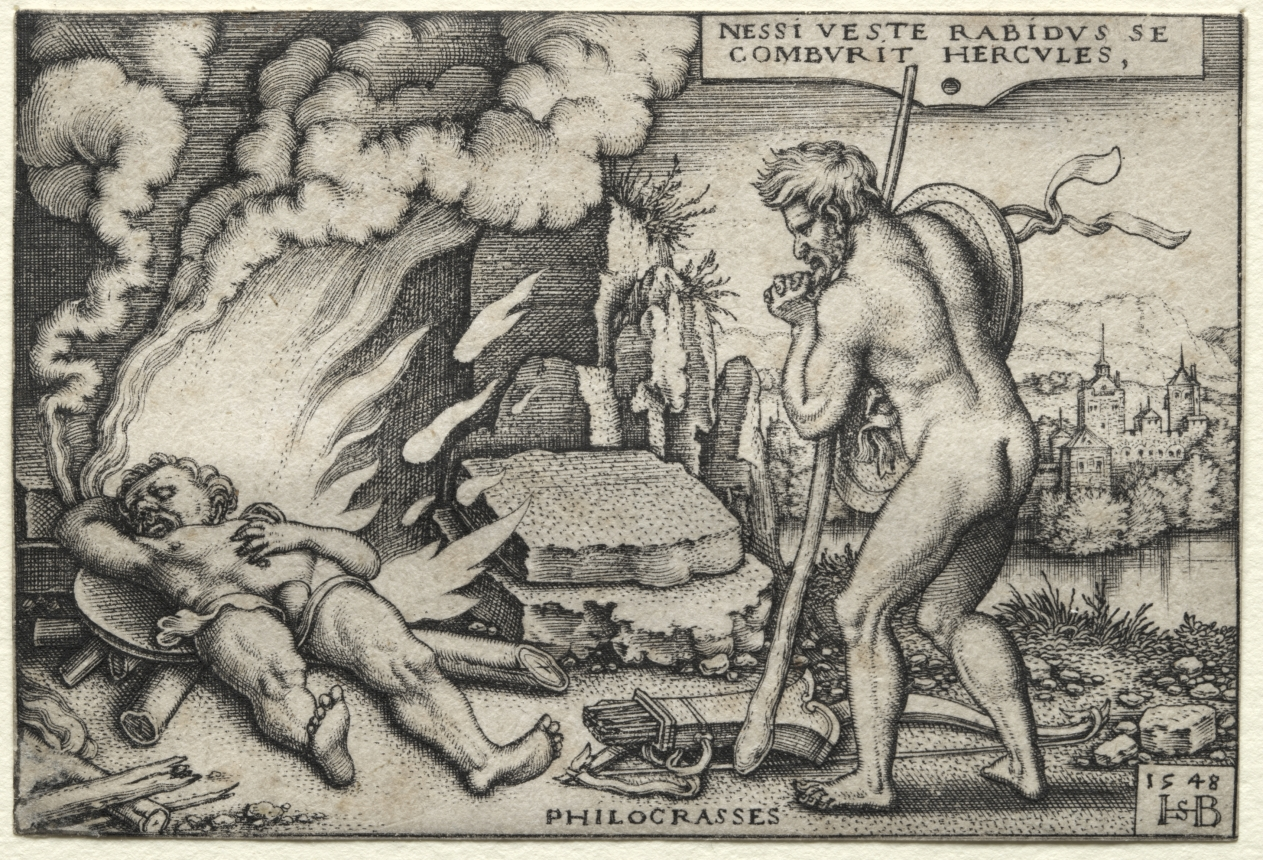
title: The Labors of Hercules: Hercules on his Pyre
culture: Germany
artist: Hans Sebald Beham (German, 1500–1550)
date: 1548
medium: engraving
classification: Print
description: Beham was one of several German printmakers referred to today as the “Little Masters.” They established their artistic prowess by engraving remarkably small prints, appealing to collectors fascinated with miniature objects and curiosities. Here, Beham has packed 12 larger-than-life stories of the mighty Hercules into tiny prints. The series includes three of the 12 labors Hercules performed as penance for slaying his children in a fit of madness: Strangling the Nemean Lion, Killing the Lernean Hydra, and Dragging Cerberus from the Underworld. The other scenes depict tales from his life and the events preceding his death. The son of Jupiter and the mortal Alcmena, Hercules was both man and god. His saga of moral and physical trials made him one of the most popular classical heroes in Renaissance art.